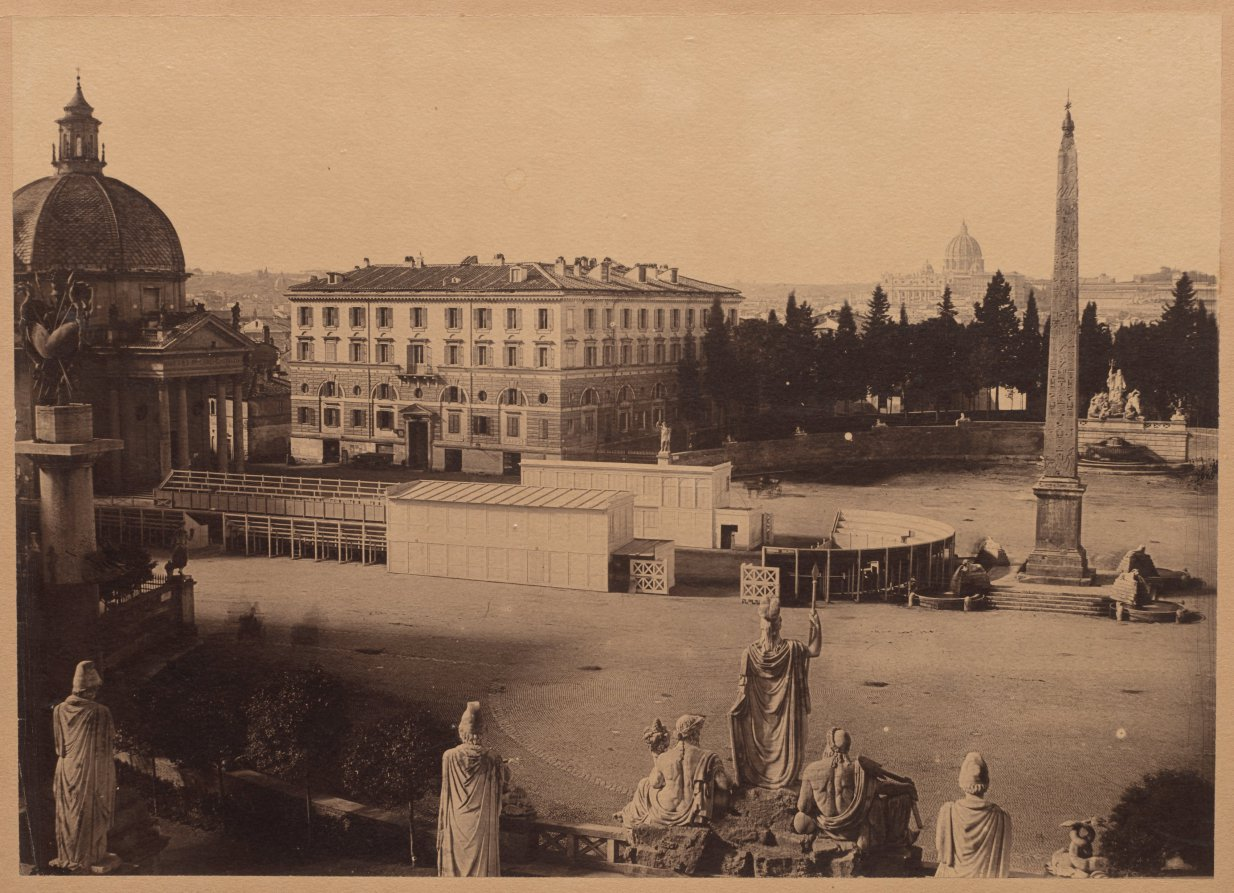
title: View of Rome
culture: Italy or France(?), 19th century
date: c. 1860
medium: albumen print from a collodion negative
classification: Photograph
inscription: Written in pencil on verso: "IT-50"